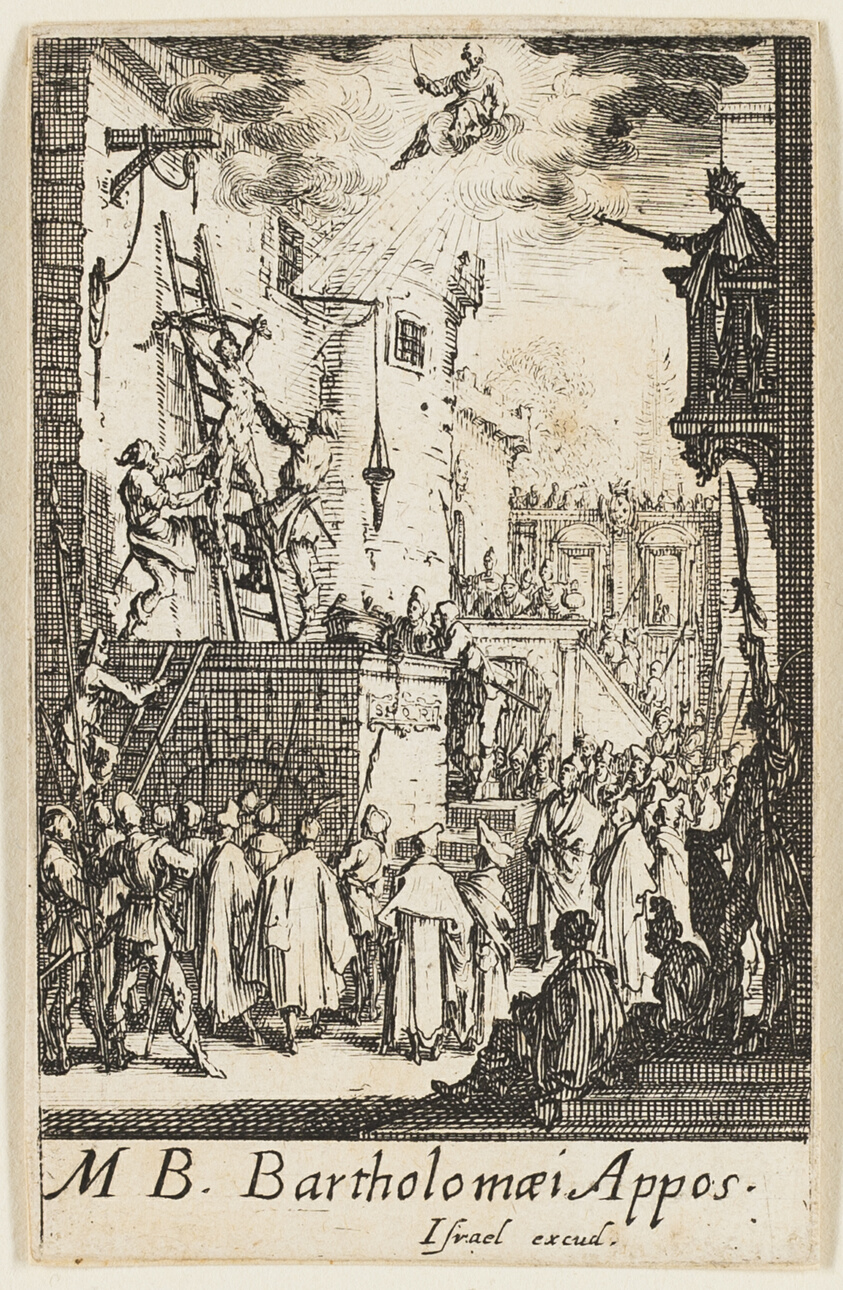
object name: Print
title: Martyrdom of Saint Bartholomew, plate nine from The Martyrdoms of the Apostles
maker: Jacques Callot (French, 1592-1635)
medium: Etching on paper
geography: France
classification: etching; print; prints and drawing